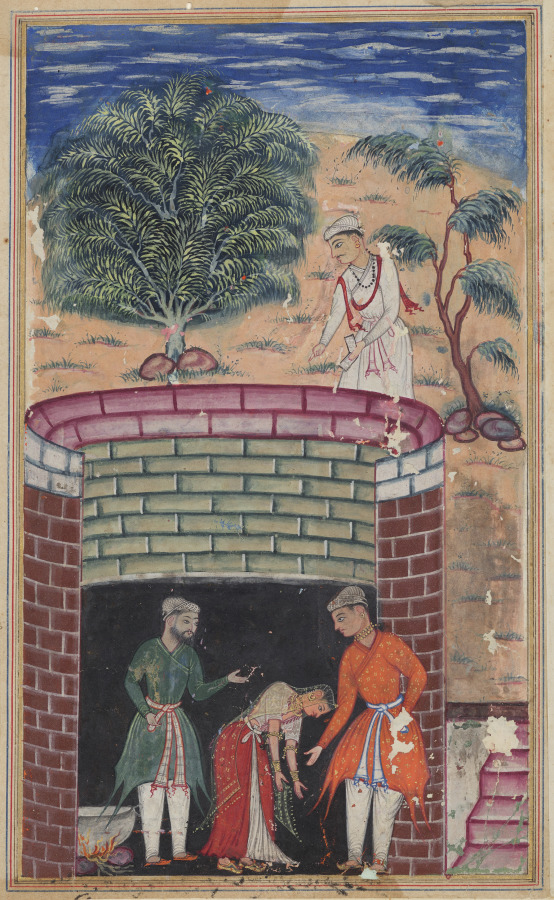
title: The daughter of the king of the jinns bows before the King of Kings who has just undergone the ordeal of passing through the boiling oil to emerge as a youth, from a Tuti-nama (Tales of a Parrot): Seventh Night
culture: Mughal India, court of Akbar (reigned 1556–1605)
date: c. 1560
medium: gum tempera, ink, and gold on paper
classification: Painting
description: The rejuvenated King of Kings, dressed in orange, stands at the bottom of a pit with the daughter of the king of the jinns and her elderly lover. The Brahman, dressed in white, peers over the edge. The King rubs the old man with the elixir of life so that he can pass through the oil and be purified.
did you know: The boiling oil purifies the old man by burning away his animal characteristics.